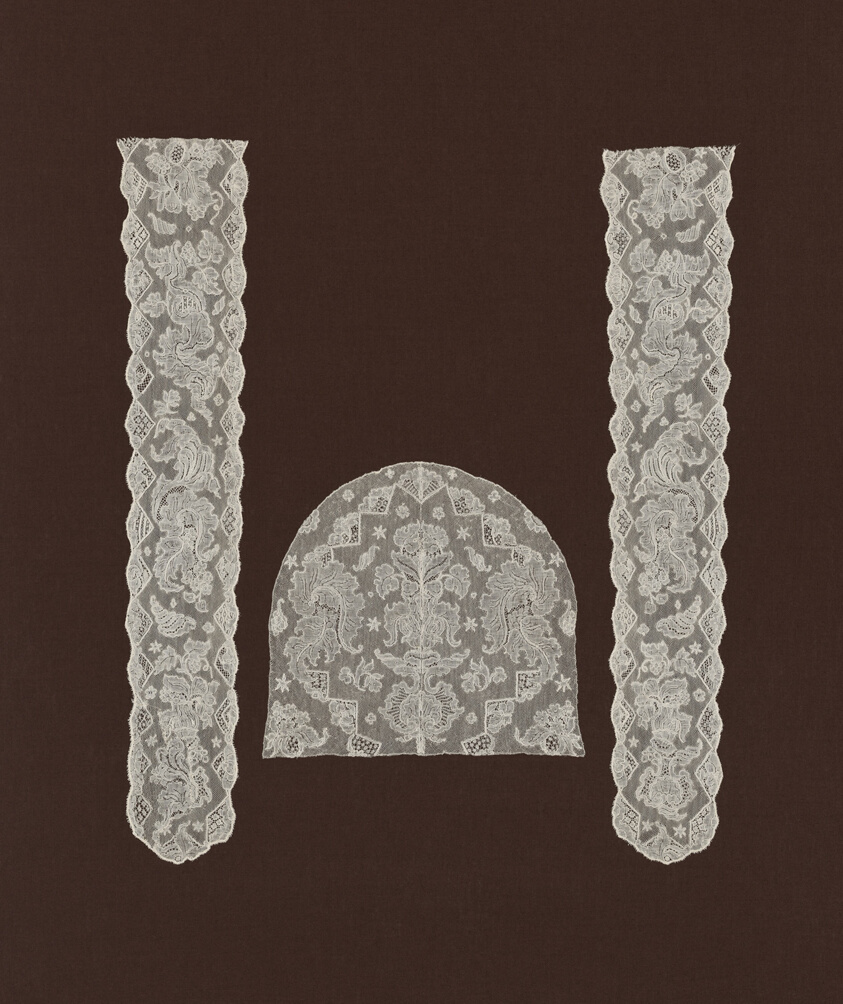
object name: Costume and Accessories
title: Lappet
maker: Belgium, Flanders, Mechlin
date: 1740s/50s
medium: Linen, bobbin straight lace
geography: Belgium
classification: costume accessory; lace - bobbin; lace; textile; costume; costume accessory - headdress; costume accessory worn above the waist